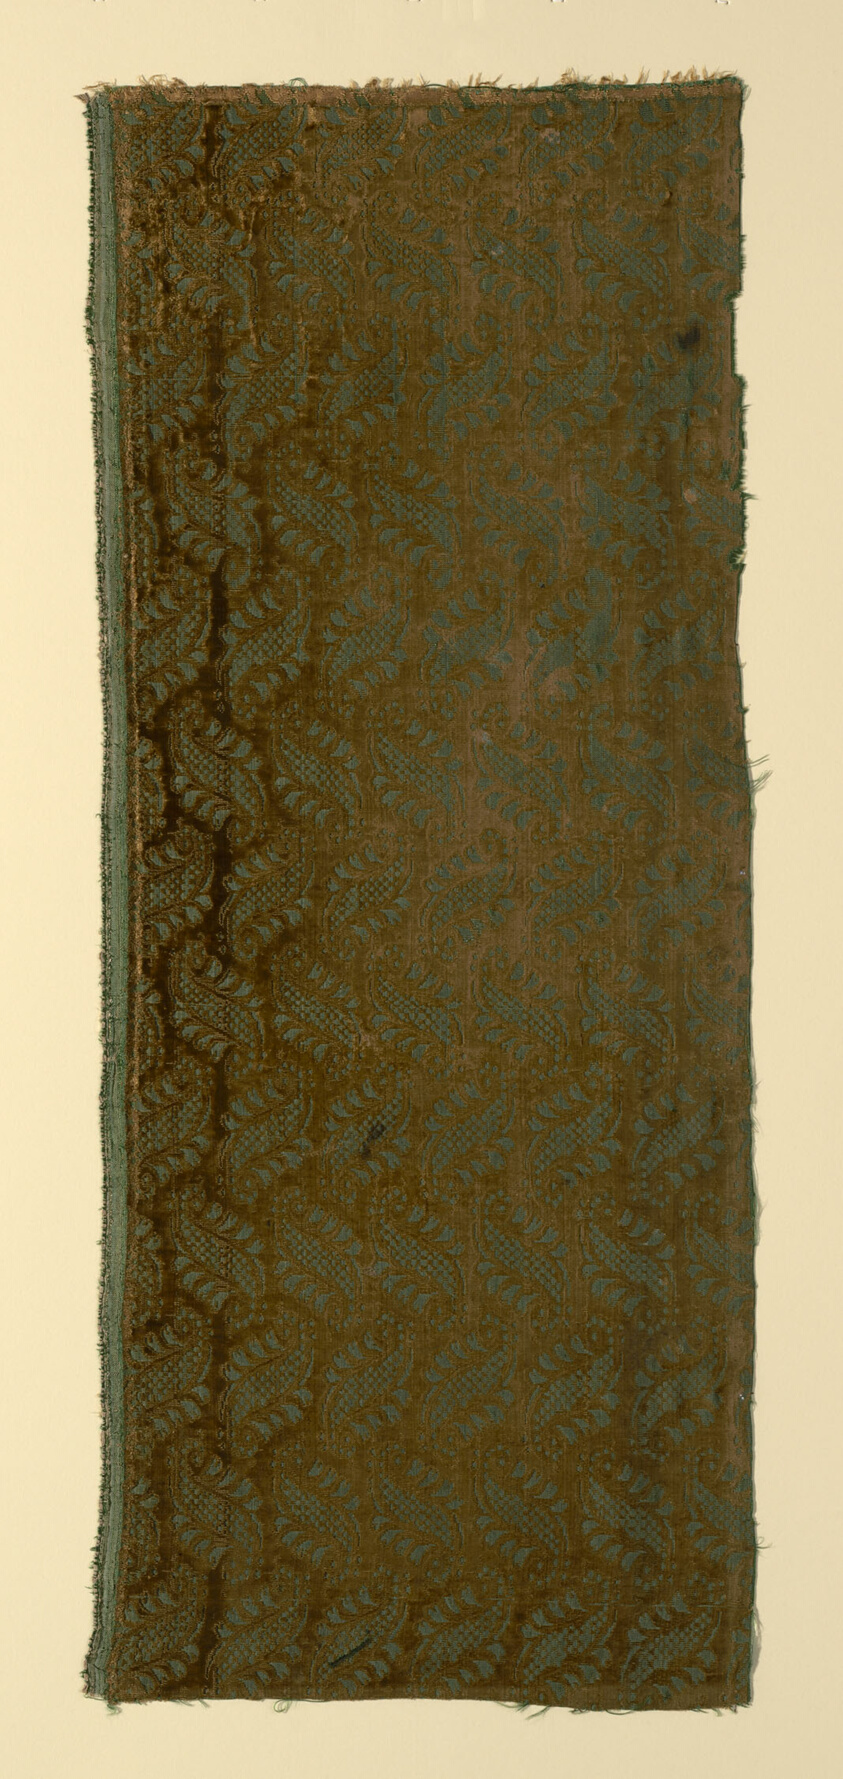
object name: Textile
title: Fragment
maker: Italy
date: 16th century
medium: Silk; cut, uncut voided velvet against plain weave foundation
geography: Italy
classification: textile; weaving - velvet; weaving